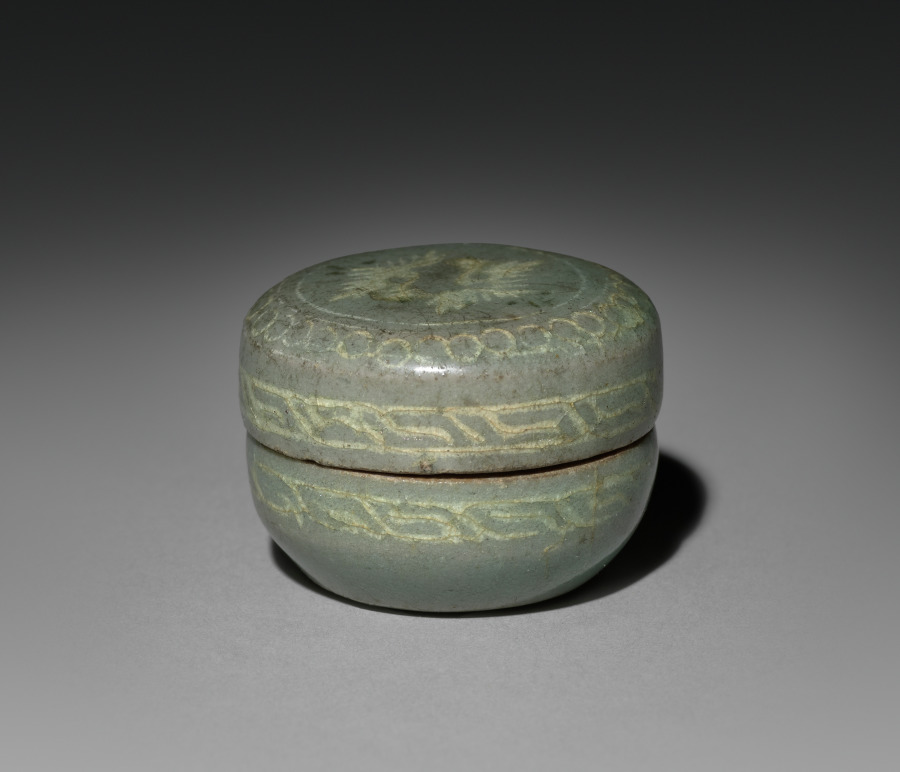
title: Box and Cover with Inlaid Crane Design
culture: Korea, Goryeo dynasty (918–1392)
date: 1200s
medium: celadon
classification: Ceramic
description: Celadons, spoons, seals, and bronze mirrors were the most common burial objects in tombs during the Goryeo period (918-1392). Once used to contain color powder, rouge and eyebrow gel for makeup, this small container was one of the standard goods that furnished elites' tombs. Goryeo-period women and men used the grain powder of rice or millet for whitening their skin, safflower extract for rouge, and plant ash or soot for eyebrow gel. Yet, natural-looking make-up seems to have been the most favorable one in Korea according to the travelogue by Xu Jing (1091-1153), the Chinese diplomat who visited Korea in 1123.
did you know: This ceramic container was used to store either incense or cosmetics.